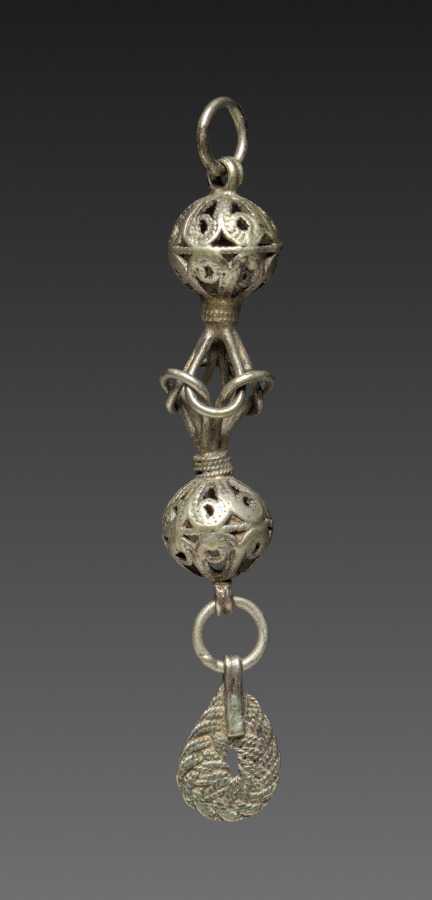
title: Button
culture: Balkans(?), 19th century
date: 1800s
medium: silver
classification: Jewelry